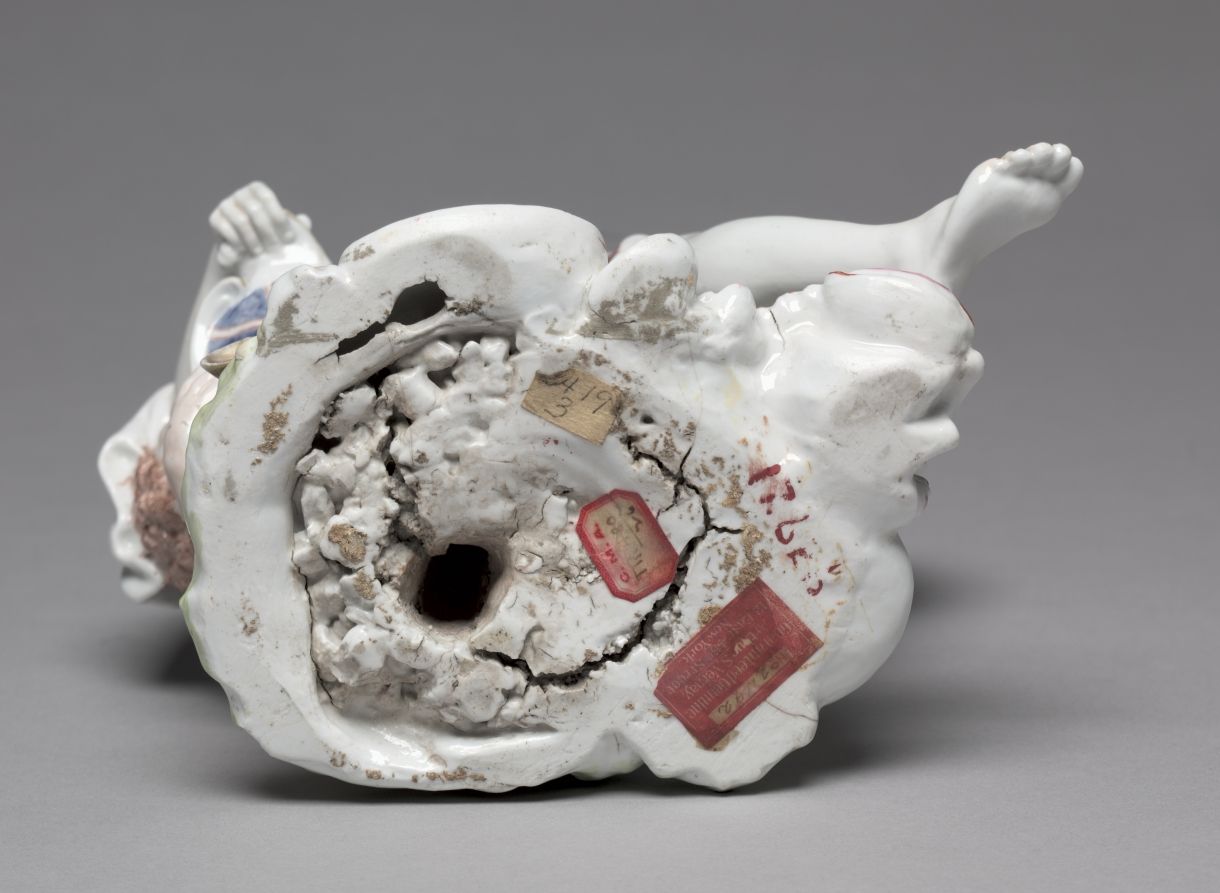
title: Figure of Britannia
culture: England, Staffordshire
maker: Longton Hall Porcelain Factory (British, Staffordshire, 1749–60)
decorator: Vauxhall Porcelain Factory (British, 1751–1764)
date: c. 1756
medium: soft-paste porcelain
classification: Ceramic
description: In this depiction of Britannia, the figure is surrounded by symbols of England’s power and military might. On one side, she and a lion, another symbol of Britain, support a shield adorned with the Union flag. Below it lay motifs associated with war such as armor, a trumpet, and a flag. On her left, Britannia presents a medallion to the viewer as she rests her feet on a globe, a symbol of the nation’s territorial aspirations. The portrait may depict the reigning king, George II (1683–1760), or Prince Frederick Louis (1707–1751), his recently deceased heir.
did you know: The creation of this triumphant personification of the nation was likely spurred on by Great Britain’s conflict with France in the Seven Years’ War (1756–63).